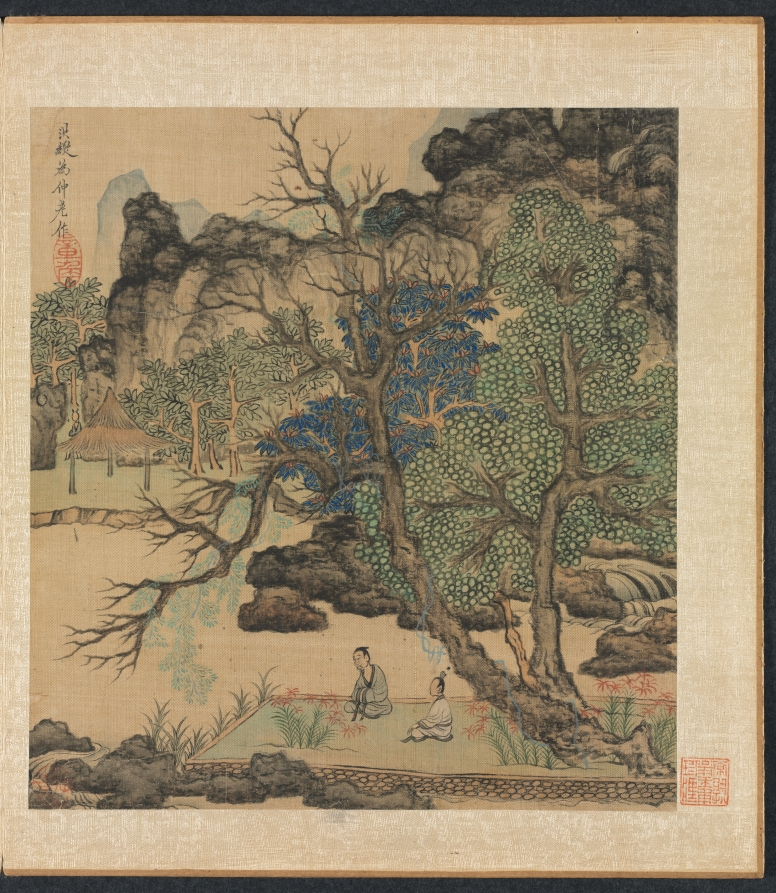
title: Paintings after Ancient Masters: Scholars in a Garden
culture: China, Ming dynasty (1368–1644)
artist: Chen Hongshou (Chinese, 1598/99–1652)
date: 1598–1652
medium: album leaf; ink and color on silk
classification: Painting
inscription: Hongshou painted for old Zhong. [Seal] Zhanghou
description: The twenty paintings in this double-album by Chen Hongshou include landscapes, figures, and flowers. It also has one leaf featuring a woman, an often-used subject not found in the other albums from the latter part of his career. His late works are wonderful summations of Chen's peculiar and quirky art--archaistic, hyper-refined--but without accompanying shallowness or sentimentality. His figures and landscapes in the late albums are miniaturized, not unlike the small Chinese gardens, or the carefully selected small table rocks or old roots used for contemplation to see the world in miniature. This loss of scale is quite deliberate and reflects the psychological situation of a depressed class like the Ming loyalist officials and scholars, deprived of their integrity and honor, and forced to lead a diminished and restricted existence.